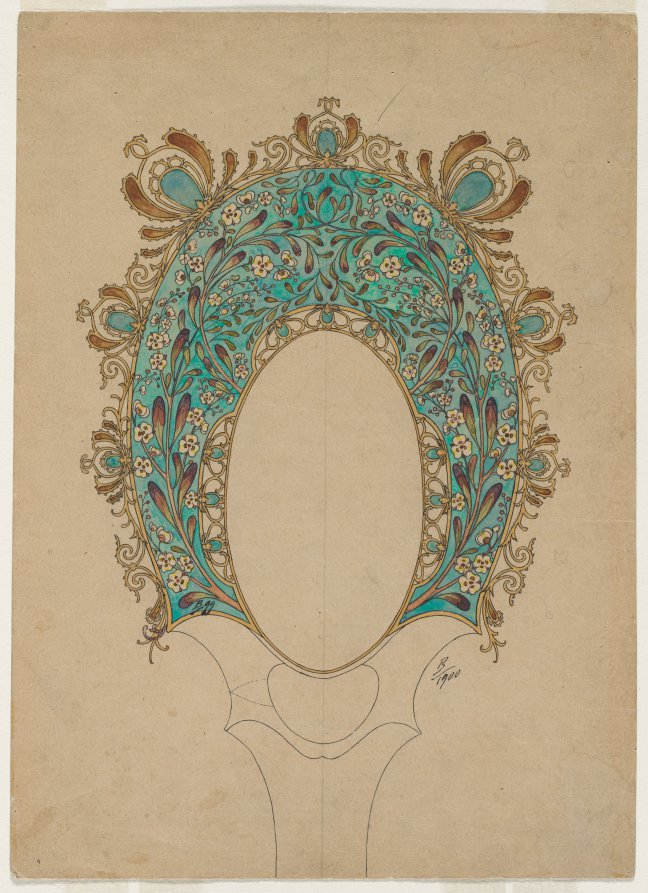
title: Design for a Hand Mirror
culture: France, 20th century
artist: Félix Bracquemond (French, 1833–1914)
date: c. 1900–1902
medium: watercolor and pen and black ink with graphite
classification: Drawing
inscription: The window mat bears an inscription written in graphite pencil along the bottom edge: "ENCRE DE CHINE/ET/AQUARELLE/BRACQUEMOND (FELIX) - 1833 - 1914 PROJECTS DE MIROIR UTILISANT UN BAS RELIEF DE RODIN Rep_?_ Arts Decoration 1902 Tome XII p. 10 Pour le Baron Vita."